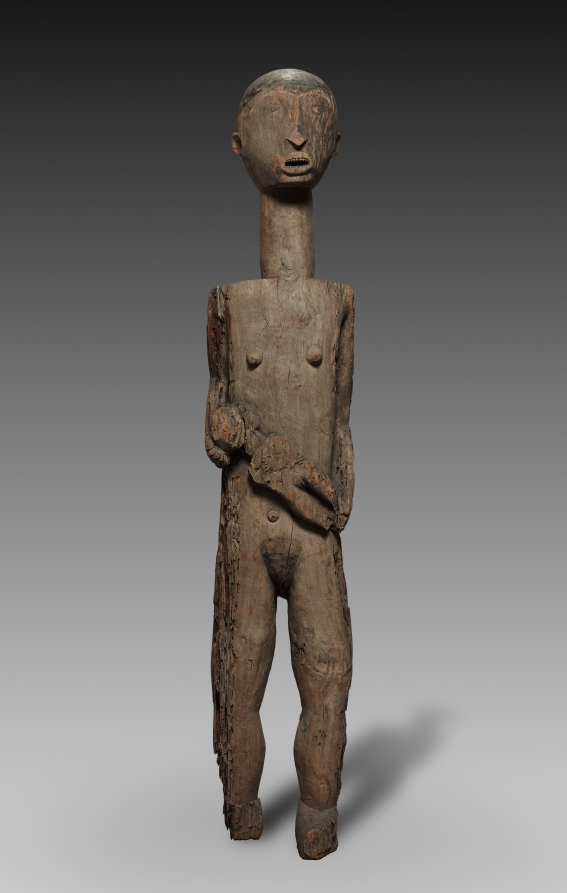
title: Figure of a Pair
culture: Africa, Central Africa, Democratic Republic of the Congo or Central African Republic (most likely), possibly Monzombo-style maker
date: late 1800s–early 1900s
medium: Wood and iron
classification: Sculpture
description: The Ubangi region's history of successive migrations and assimilations has resulted in numerous exchanges of religious beliefs and ritual practices. Despite some stylistic traits, including the heart-shaped faces and the male's crested coiffure, this figure with its female pair is unlike any other in the Ubangian corpus. Based on indirect evidence, the pair is said to represent the culture's primordial couple.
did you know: There are no other carved mother-child figures that originate from the Monzombo ethnic group.